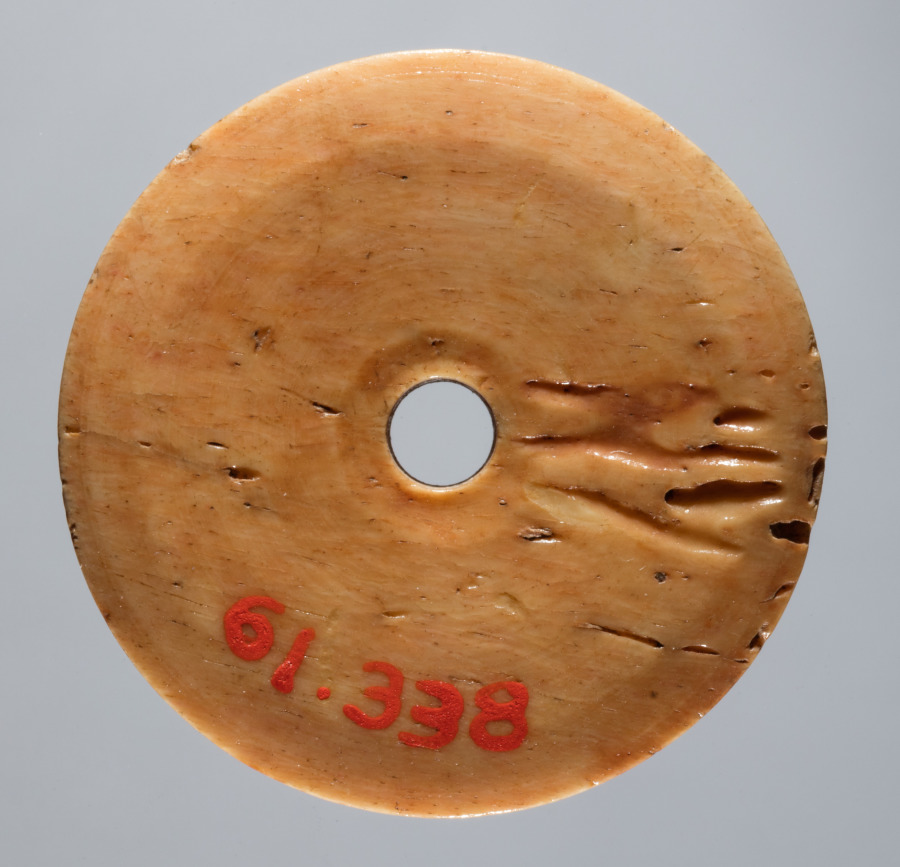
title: Spindle Whorl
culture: Iran, early Islamic period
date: 700s - 900s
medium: bone, incised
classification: Spindle Whorl